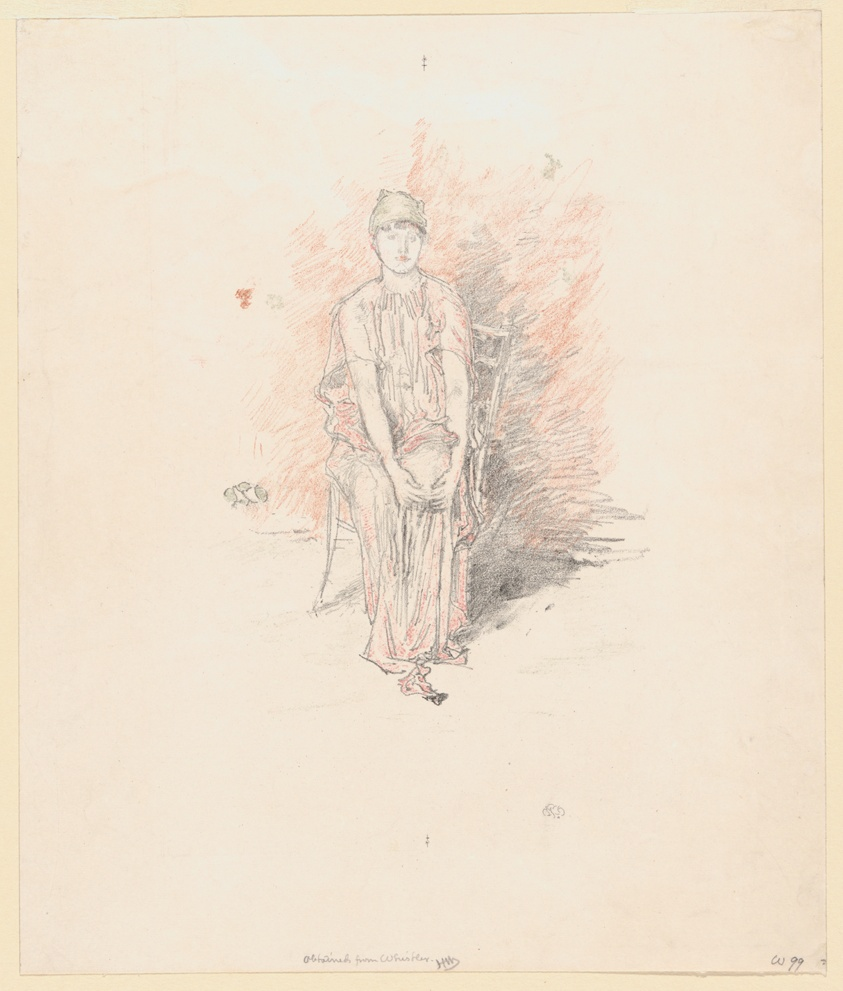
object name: Print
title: Figure Study in Colors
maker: James McNeill Whistler (American, 1834-1903)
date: 1890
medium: Transfer lithograph from four stones, in black (keystone), orange-red, rose-red, and gray-green inks, on ivory wove paper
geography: United States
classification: transfer lithograph; lithograph; print; prints and drawing; paper